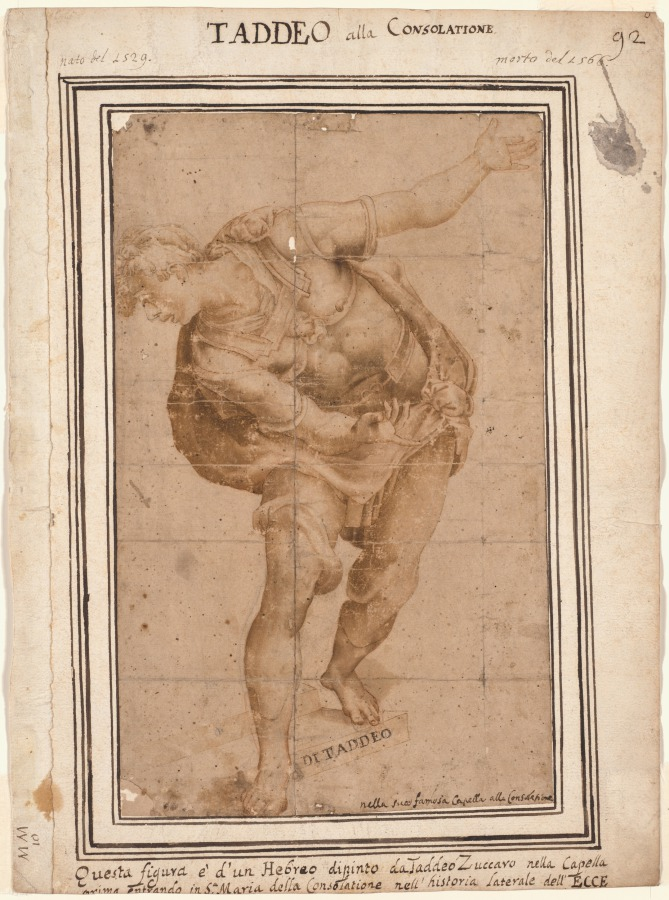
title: Un Hebreo, from Christ Shown to the People (recto)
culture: Italy, 16th century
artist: after Taddeo Zuccaro (Italian, 1529–1566)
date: after 1556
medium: Brown wash with outlining in pen and brown ink and red chalk, with traces of black chalk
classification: Drawing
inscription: Annotated by Resta in pen and brown ink in the lower right corner of the drawing: nella sua famosa Capella alla Consolatione; on the front of the step beneath the figure's left foot: DI TADDEO; the album sheet is further annotated in pen and brown ink at the top margin: TADDEO alla CONSOLATIONE / nato del 1529. Morto del 1566; lower margin: Questa figura è d'un Hebreo dipinto da Taddeo Zuccaro nella Capella prima entrando in Sa. Maria della Consolatione nell'historia laterale dell'ECCE; paginated in pen and brown ink at top right corner: 92; an inventory number (?) in the lower left corner: MM/10